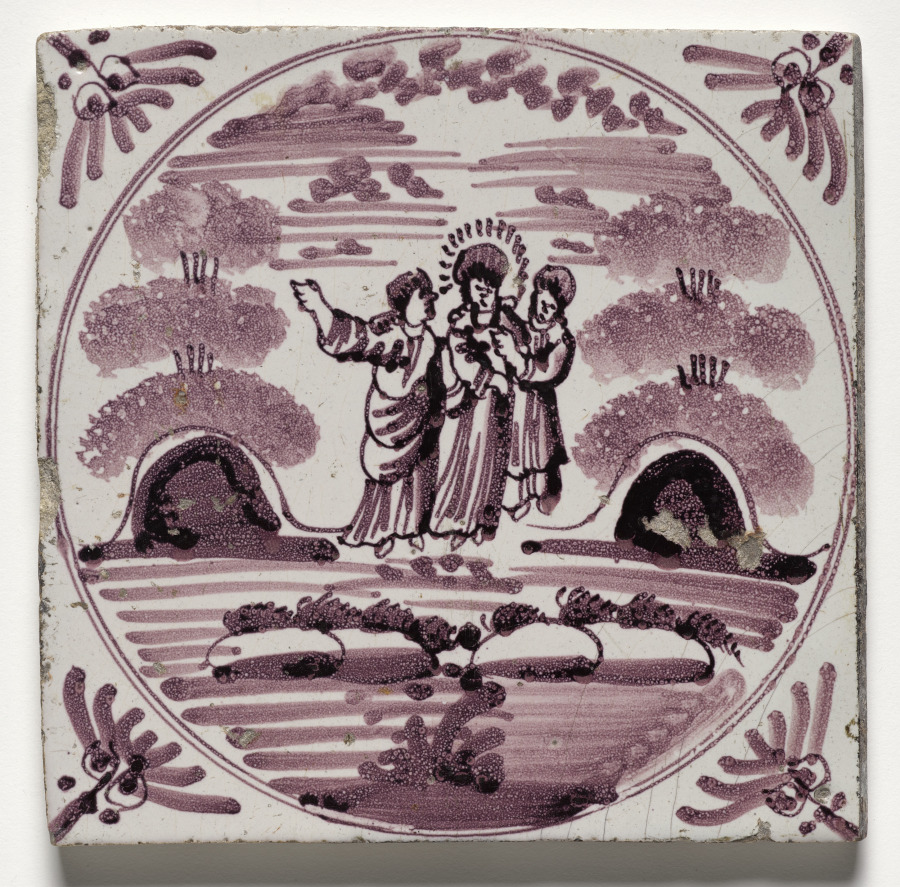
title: Tile- New Testament Scene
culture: Netherlands, Holland, Delft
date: c 1600s- 1700s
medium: glazed ceramic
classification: Ceramic